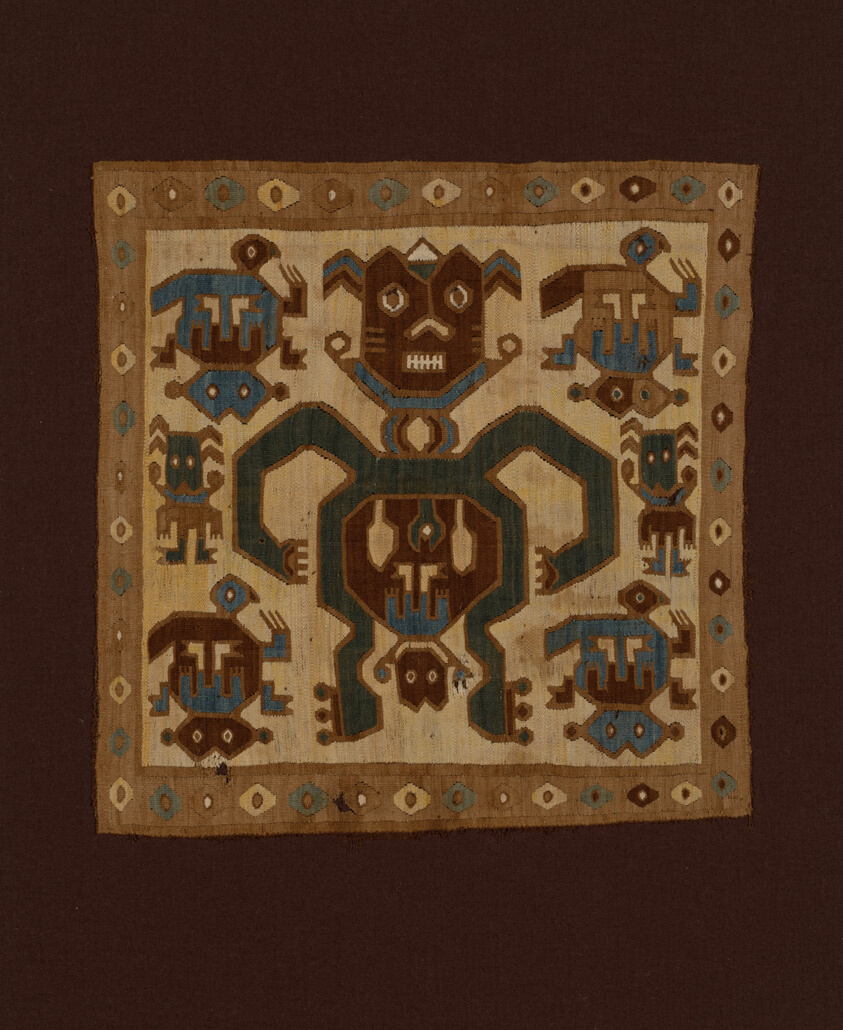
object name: Textile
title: Panel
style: Pre-Columbian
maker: Rimac (North coast, Peru)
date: 1000/1476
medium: Cotton, slit and double interlocking tapestry weave with eccentric wefts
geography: Peru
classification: textile; weaving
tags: super/natural